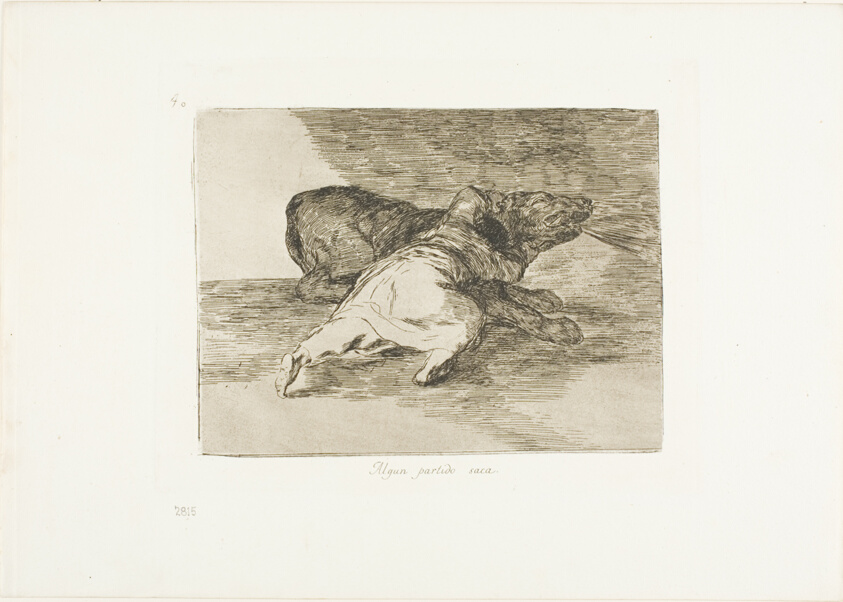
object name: Print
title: He gets something out of it, plate 40 from The Disasters of War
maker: Francisco José de Goya y Lucientes (Spanish, 1746-1828)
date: 1814/20, published 1863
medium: Etching, drypoint and burin on ivory wove paper with gilt edges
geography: Spain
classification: etching; print; prints and drawing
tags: war